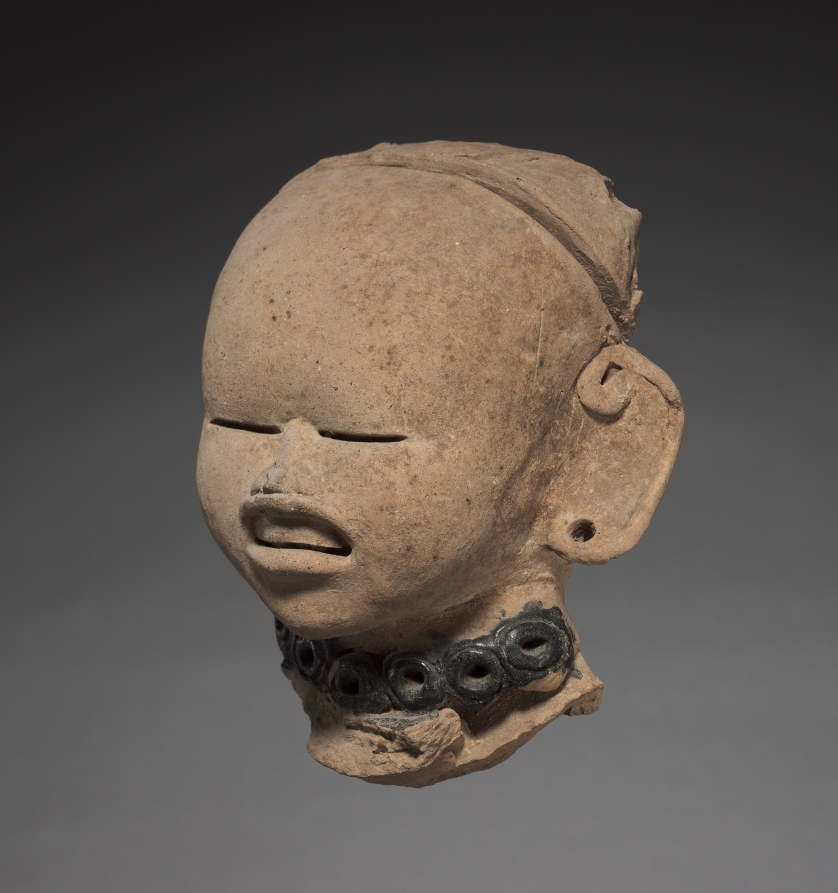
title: Smiling Head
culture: Mexico, Classic Veracruz (Totonac or Tajin)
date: 600–1100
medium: terracotta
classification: Sculpture